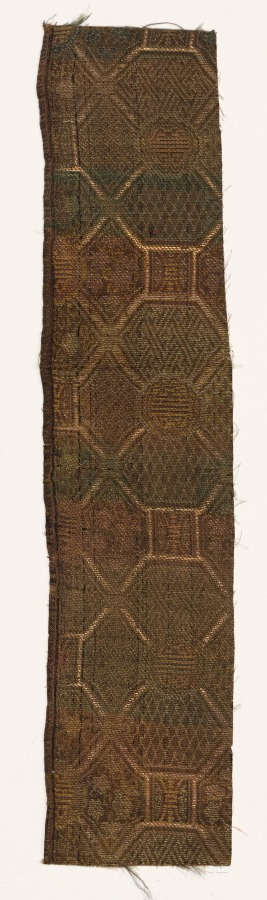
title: Fragment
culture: China, 19th century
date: 1800s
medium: silk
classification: Textile